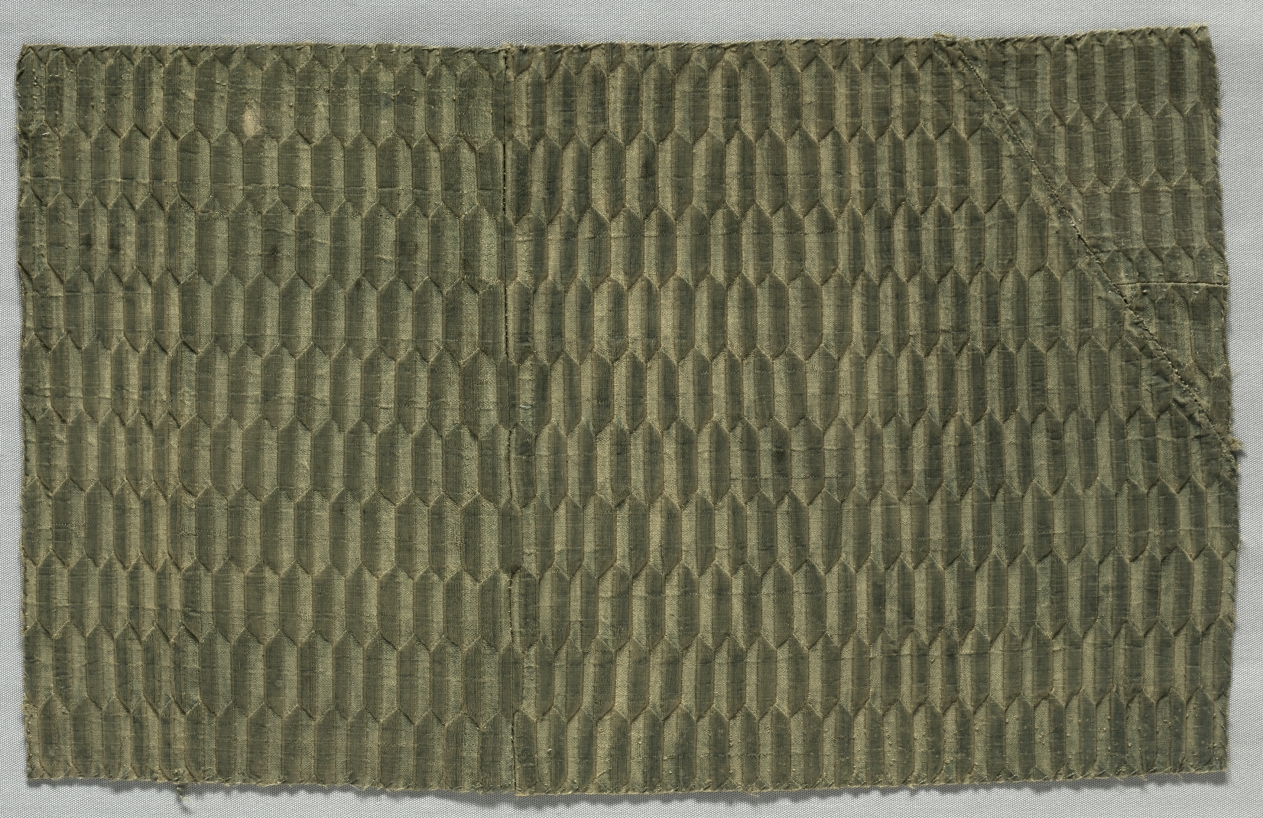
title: Silk Textile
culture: Italy, 17th century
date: 1600s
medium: lampas weave (?), silk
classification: Textile